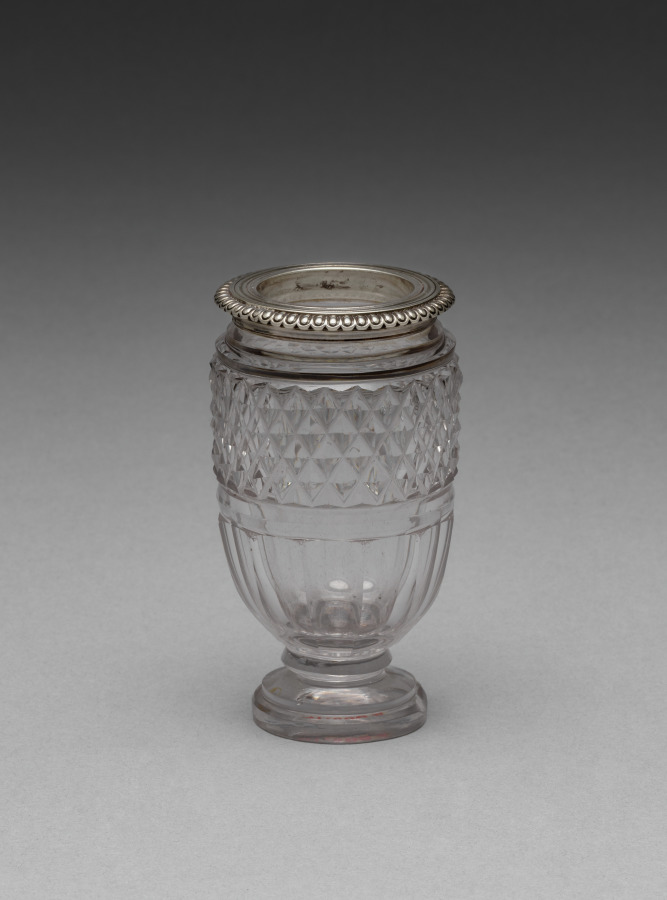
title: Pot (1 of 2)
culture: England, 19th century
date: 1817–18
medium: cut glass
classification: Glass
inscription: Stamped on rim: "PS", George III duty mark, Lion Passant, "b".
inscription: Scratched on base: "3136".